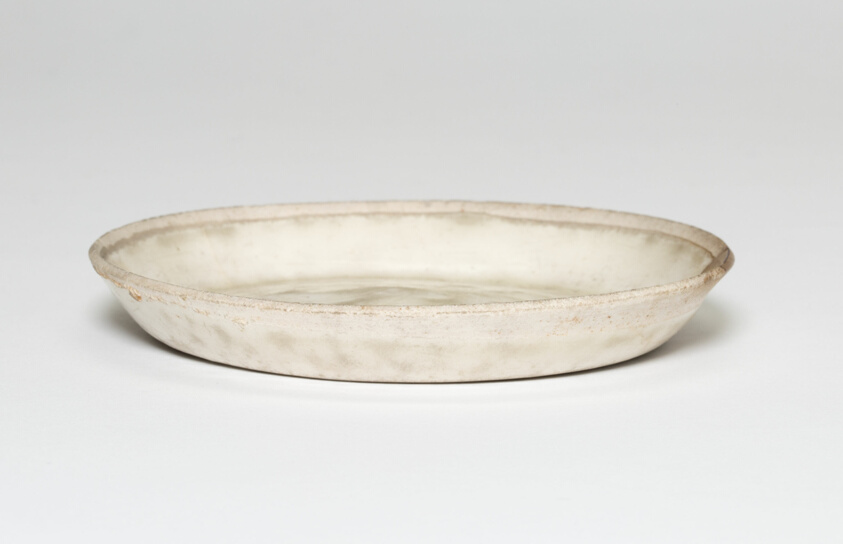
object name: Vessel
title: Dish with Floral Scrolls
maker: China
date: Song dynasty (960–1279)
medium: Stoneware with underglaze incised decoration and gold repair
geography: China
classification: ceramics; asian art